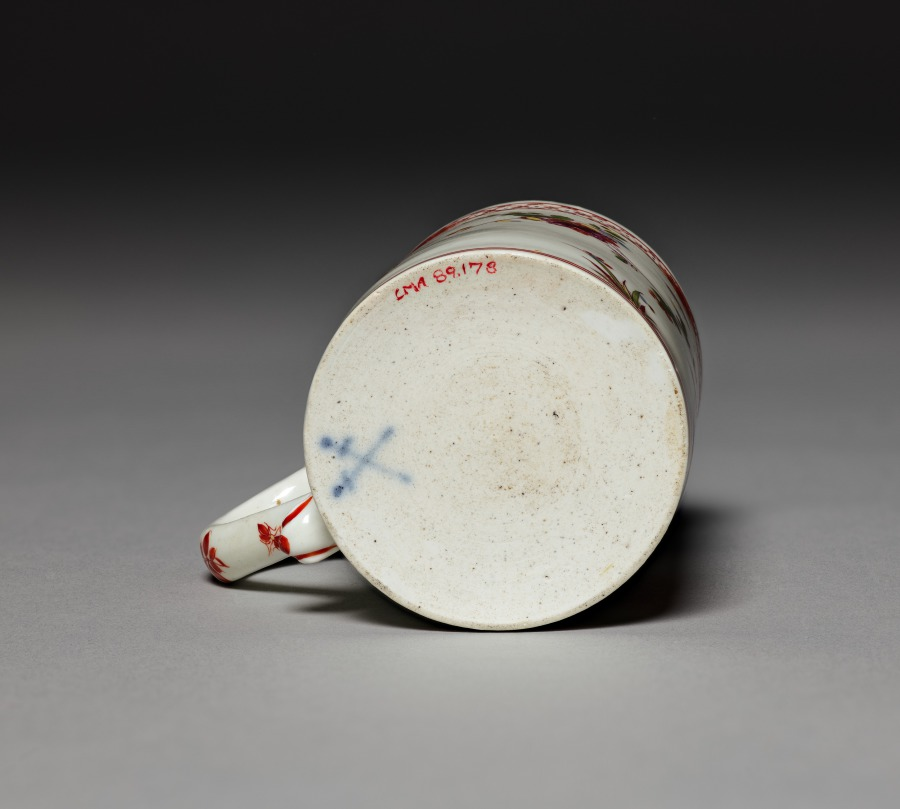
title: Small Mug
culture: Germany, Meissen, 18th century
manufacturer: Meissen Porcelain Factory (German, est. c. 1710)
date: c. 1730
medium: porcelain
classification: Ceramic